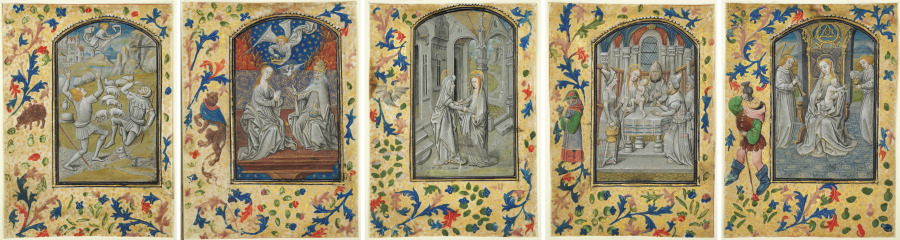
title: Leaves from a Book of Hours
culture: Flanders, Bruges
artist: Guillaume Vrelant (Flemish, c. 1454–1481)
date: c. 1470–1480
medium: tempera, liquid gold, and grisaille on vellum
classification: Manuscript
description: Guillaume Vrelant, born in Utrecht, was known to be in Bruges from 1454 onward where he died around 1481. He probably went there to sidestep a 1427 law which banned the sale of Utrecht images. A painter very much in vogue, he founded the Illuminators’ Guild in Bruges under the patronage of Saint John the Evangelist. He is known to have provided manuscripts to the Burgundian court.